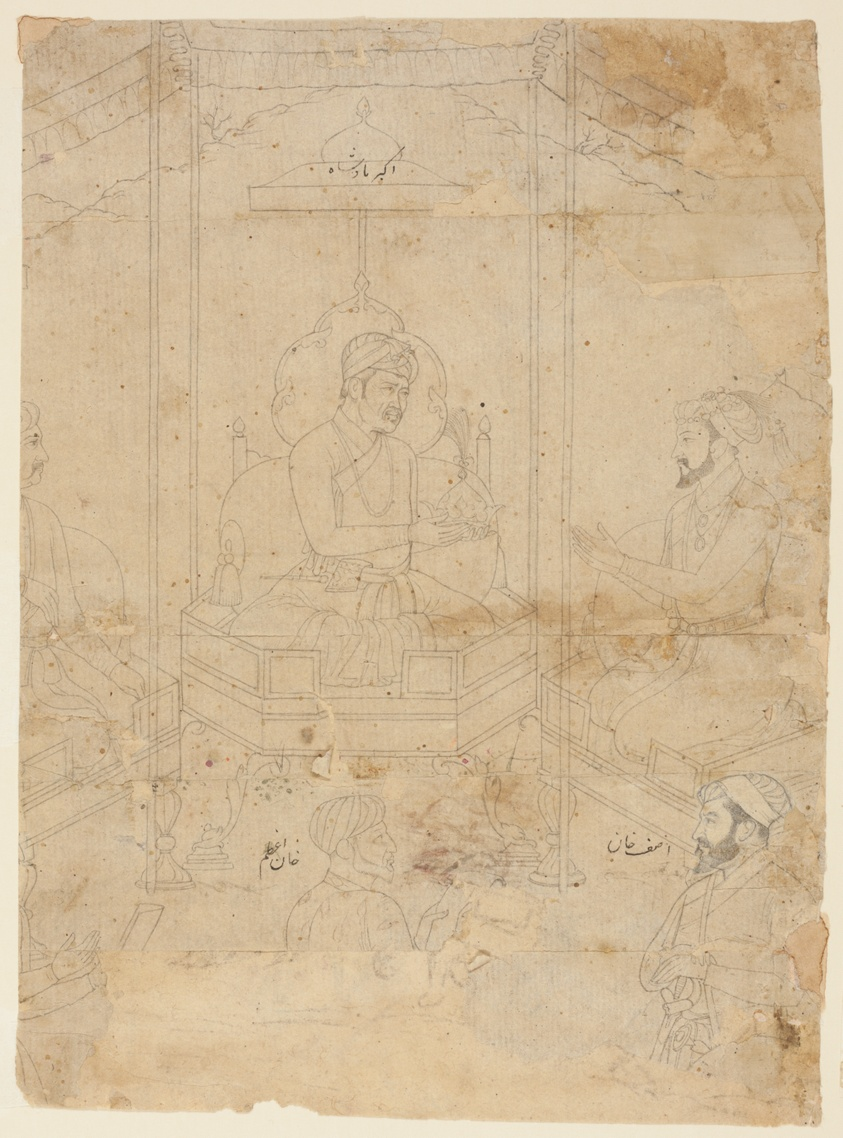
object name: Painting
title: Akbar Offering Timur's Crown to Shah Jahan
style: Islamic (culture or style)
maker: India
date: Mughal period (1526–1857), ca. 1650–1700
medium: Ink on paper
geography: Iran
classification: drawings (visual works); asian art; painting